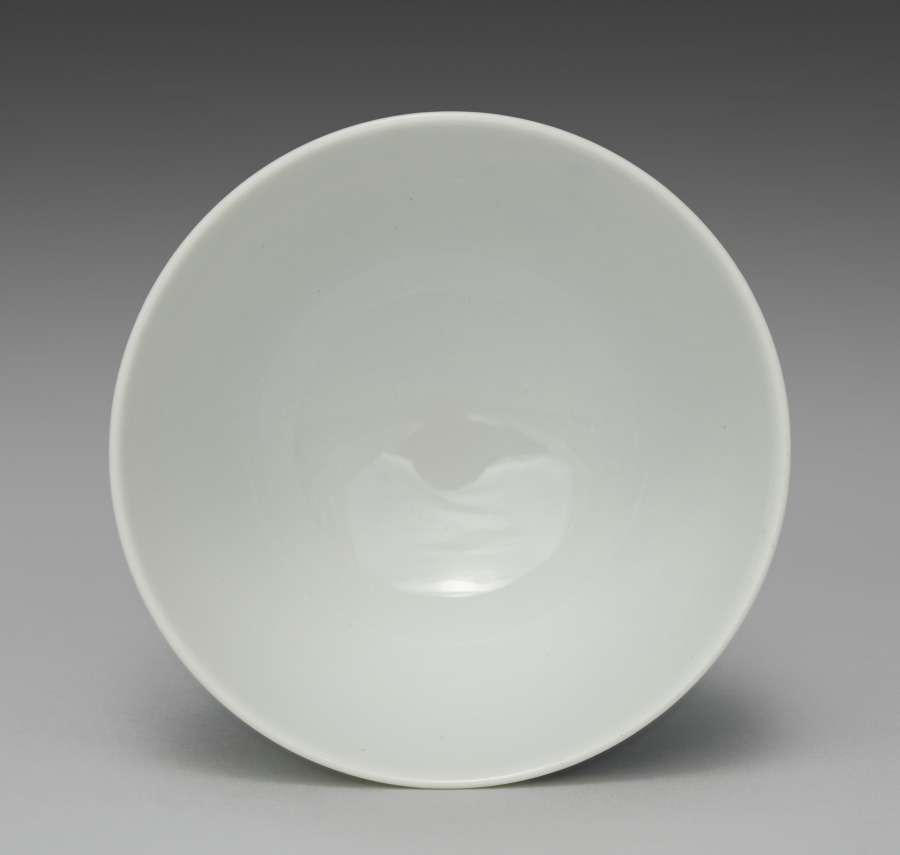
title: Teacup from Tea Set with Orchids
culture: Japan, Meiji period (1868–1912)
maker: Seifū Yohei III (Japanese, 1851–1914)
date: c. 1893–1914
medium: Porcelain with underglaze blue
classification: Ceramic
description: Although the teapot here is stored in a separate box from the five cups, these six pieces may once have been part of a tea set that included other tools such as a water cooler. The teacups have orchid flowers on both sides in underglaze blue, as well as a blue band inside the footring. The teapot has the same design and a blue band painted around the bottom of the lid’s knob. The cups’ long wood storage box is stamped on the exterior, over the lid and base, with a small red seal reading “Satō.” The same seal appears on five small squares of yellow textile, one placed in the bottom of each compartment in the teacup storage box. These are additional to the customary yellow cloths stamped with a “Seifu” seal. Interestingly, four of the Seifū cloths are stamped with an ovoid seal, while the remaining cloth, which is a slightly lighter color, has an unusual seal that is not quite gourd-shaped and with the fū of Seifū in a stylized, unrecognizable form. The teapot has its own box with a Satō seal and is wrapped with an orange textile stamped with the same unusual Seifū seal. A set with a very similar surface design is in the Brooklyn Museum. The Brooklyn set has a water cooler and a small pitcher, in addition to the teapot and cups, and all are in a single storage box. This box records the tea tools as made with kanpakuji, or “bright-jewel white porcelain,” counted among Yohei III’s most important inventions, and carved images. In fact, both sets have a white surface much closer in coloration to the cool white of porcelain clay used in Kyoto at the time, and the designs are simply painted. The Brooklyn set was thus likely mismatched at some point with a box intended for another tea set. Nonetheless, the box may have helped prevent the set’s original components from being dispersed, and the set itself provides insight into how the other tools from the present set may have looked.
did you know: This tea set with orchids has a side-handled pot called a kyūsu, used for steeping, straining, and serving tea.